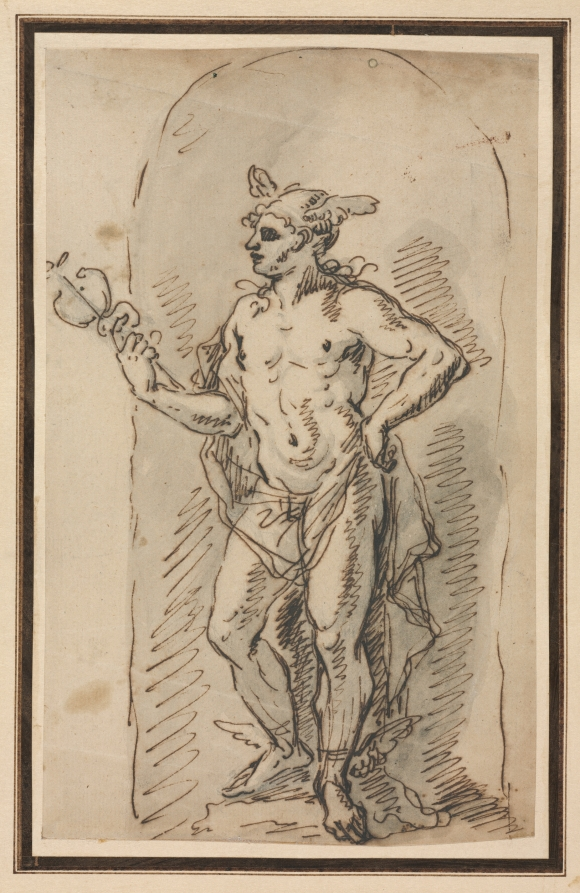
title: Mercury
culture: Italy, 18th century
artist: Anonymous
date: 18th century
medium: pen and brown ink and brush and gray wash over graphite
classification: Drawing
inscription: VERSO OF SECONDARY SUPPORT, upper center, in graphite: Flemish Mannerist / XVII c ; lower left, in graphite: 31093; lower left, in graphite: GANDOLFi